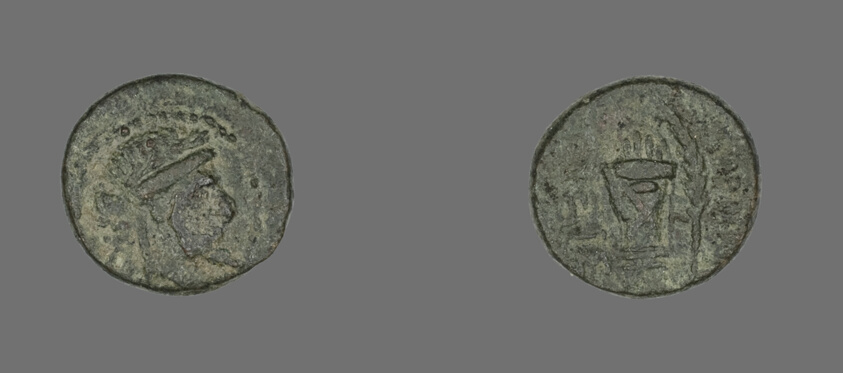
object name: Coin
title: Coin Depicting the God Apollo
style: greek, ancient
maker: Greek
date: 2nd-1st century BCE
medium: Bronze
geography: Smyrna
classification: coin; ancient art